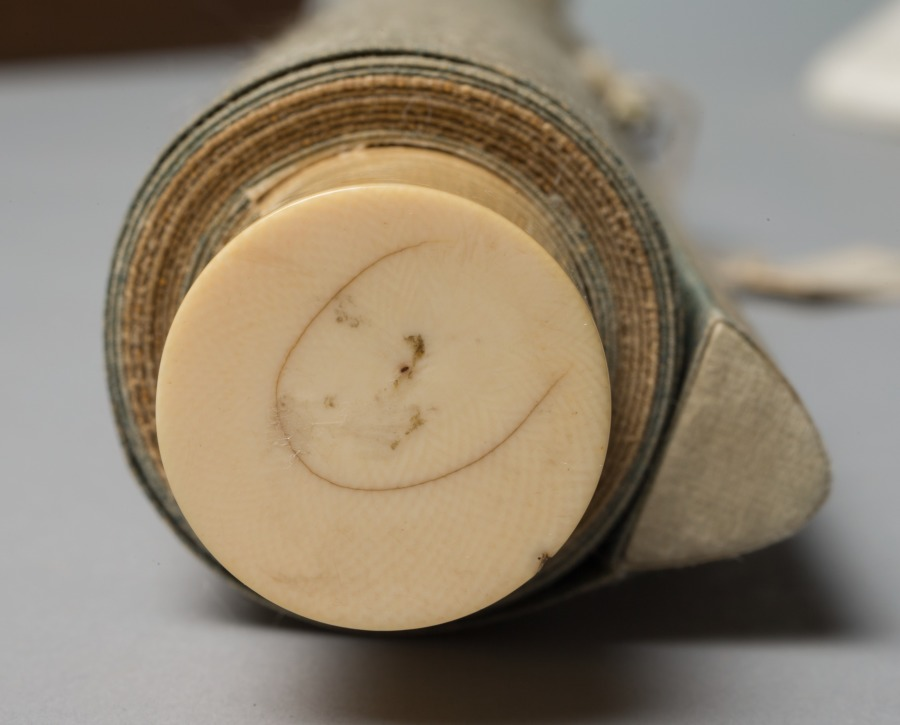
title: Mandarin Duck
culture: Japan, Muromachi period (1392–1573)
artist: Sesson Shūkei (Japanese, c. 1492–c. 1577)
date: 1500s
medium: hanging scroll; ink on paper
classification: Painting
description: In this painting, the artist depicted a scene of a solitary duck floating by reeds in a subtle arrangement of dry and wet, light and dark ink tones which conveys the tranquility of the moment.